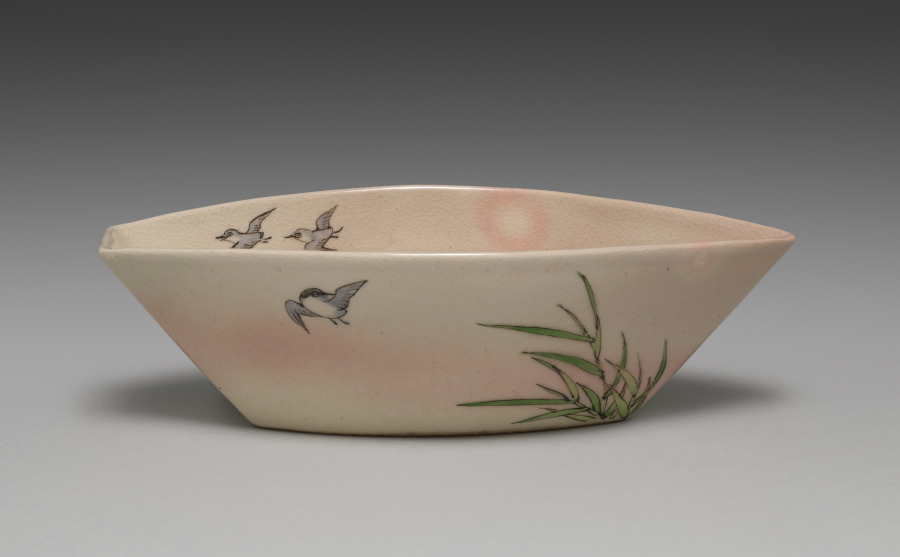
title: Boat-Shaped Bowl with Plovers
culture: Japan, Meiji period (1868–1912)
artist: Seifū Yohei III (Japanese, 1851–1914)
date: 1893–97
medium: Stoneware with crackled glaze and overglaze color enamel and gold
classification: Ceramic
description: Overglaze color enamels create a seascape made complete by the bowl’s boat shape. The bowl’s form inserts a human presence into the scene, much in the way rusu mōyō is used in paintings to suggest people just out of view. Rusu mōyō is a pictorial device by which the presence of someone physically absent from an image is conveyed through the depiction of clothing or other items. The inside of the bowl has a scene of plovers flying through the sky over a profusion of seaweed in sand below. In addition to the black, gray, and green of the overglaze elements, warm pink banding and mottling in the clay come through the glaze and are remarkably effective at suggesting the seashore.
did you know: On the outside of the bowl, on each side, birds fly about grasses in search of a meal.